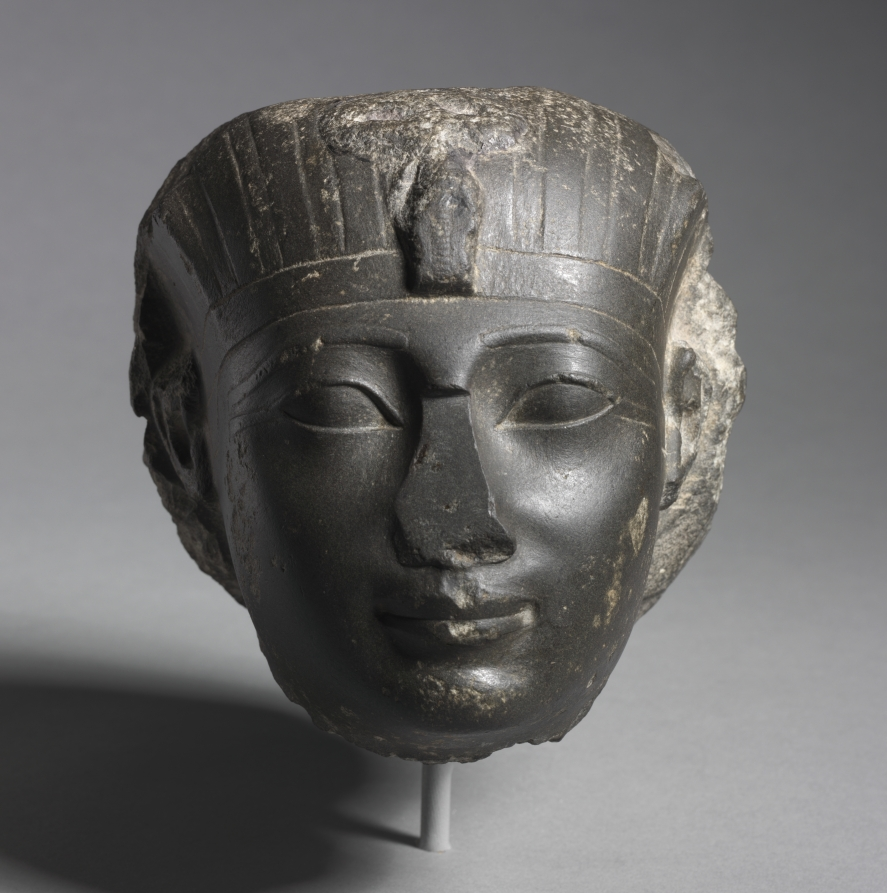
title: Head of Queen Hatshepsut (?)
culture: Egypt, New Kingdom (1540–1069 BCE), Dynasty 18, reign of Hatshepsut (c. 1479–1458 BCE)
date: c. 1479–1457 BCE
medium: graywacke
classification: Sculpture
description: Tuthmosis III was still a child when he came to the throne, so his stepmother and aunt, Hatshepsut, assumed the reins of government, first as regent, then as full-fledged king beside him. This beautiful head represents either Hatshepsut or Tuthmosis III, whose facial features are notoriously difficult to tell apart. They ruled together for 22 years, and presumably the same sculptors worked for them both. Very likely the sculptors themselves did not know whose statue they were working on until the final inscription was added.